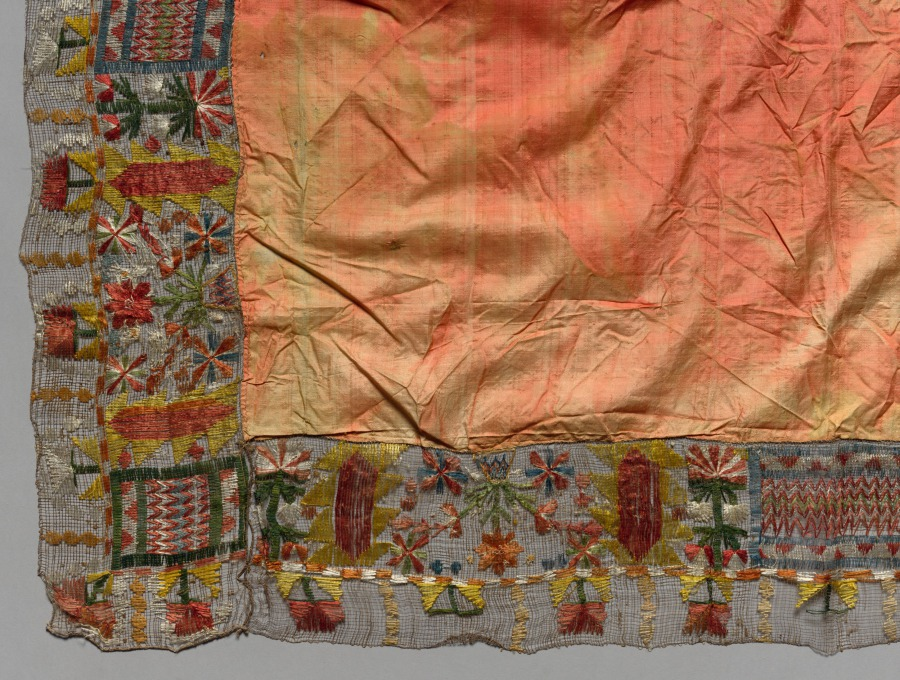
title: Cover with Border of Abstract Floral Motifs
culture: Italy ?, 1700s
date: 1700s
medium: Rose silk (est.) center: plain weave Silk (est.) embroidery on unidentified ground fiber border: needle lace, burato (twined ground and darned in one direction)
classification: Lace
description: Notable for its bright and valued colors, this cover has a needle lace border of natural and organic motifs attached to a silk cloth. The lace is divided into two registers, possibly representing stylized plants and flowers growing above ground with their roots growing in pots beneath them.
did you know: The large size and square form suggest that this textile would likely have been used as a table cloth.